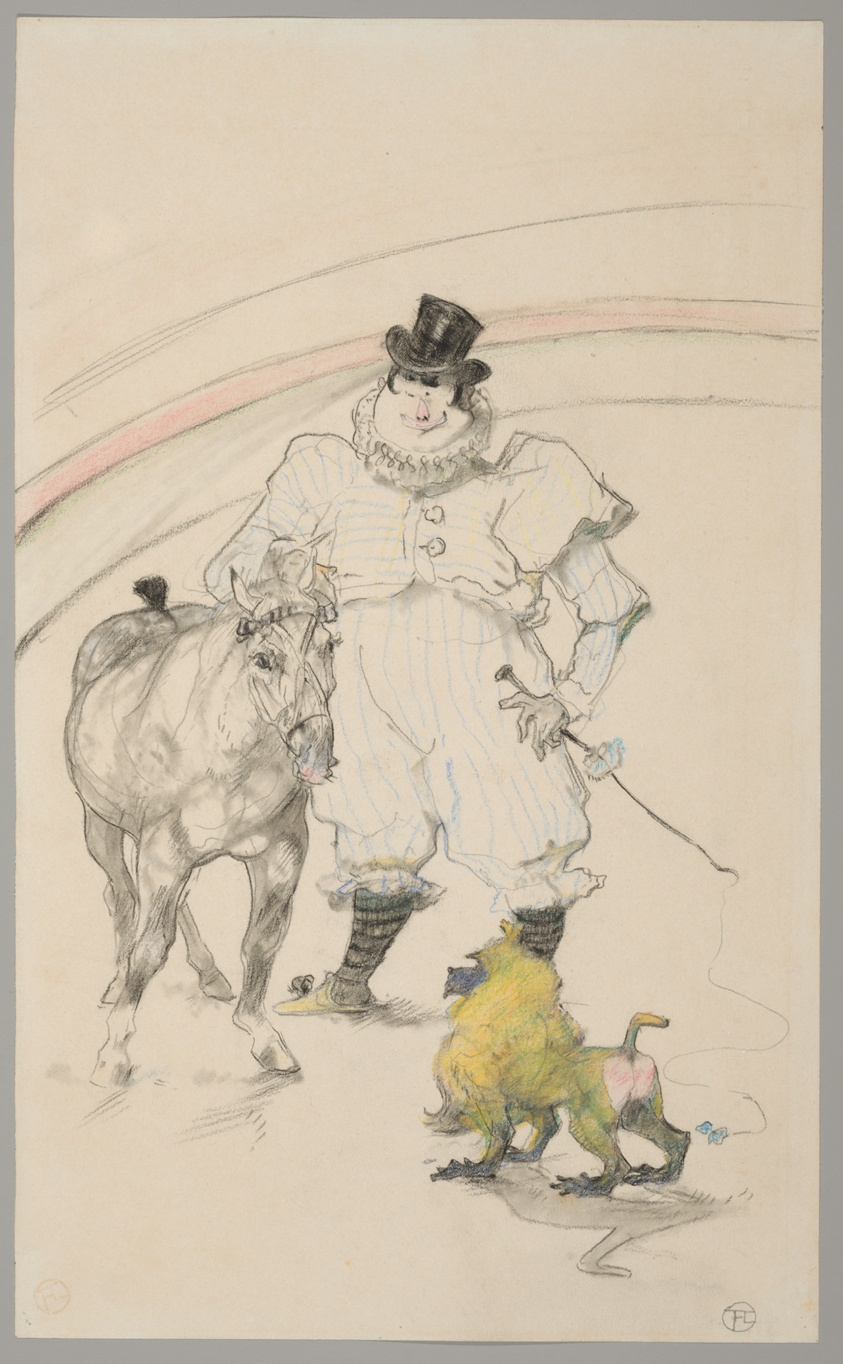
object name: Drawing and Watercolor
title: At the Circus: Trained Pony and Baboon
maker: Henri de Toulouse-Lautrec (French, 1864-1901)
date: 1899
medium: Pastel and graphite on cream wove paper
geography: France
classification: crayon; drawings (visual works); prints and drawing